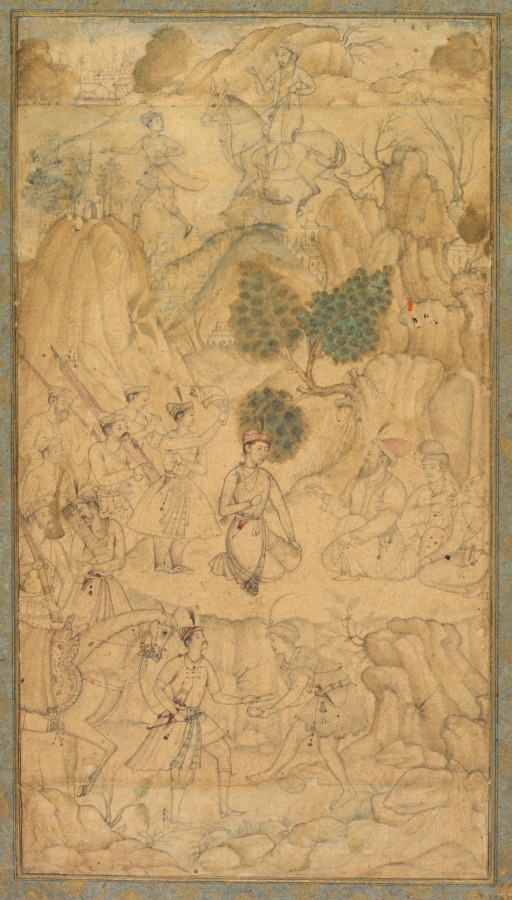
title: A Prince Visiting a Holy Man in a Rocky Landscape (recto)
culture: India, Mughal, 16th century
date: c. 1590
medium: Gum tempera, ink, and gold on paper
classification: Painting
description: A recurring theme in the art of India is the relationship between rulers and the religious practitioners who were believed to control supernatural forces that would aid in the success of rule and war. A prince has come to the abode of a Sufi mystic dervish, who sits with two acolytes in front of a rocky cave that may be his dwelling. The dervish appears to be blessing the prince and the weapons carried by his retinue to help assure success in an upcoming battle. In the foreground, a princely figure leading a horse meets surreptitiously with an eccentric figure holding a squat vessel, possibly filled with a narcotic substance such as bhang, used by many groups of mystics to aid in reaching trance states.